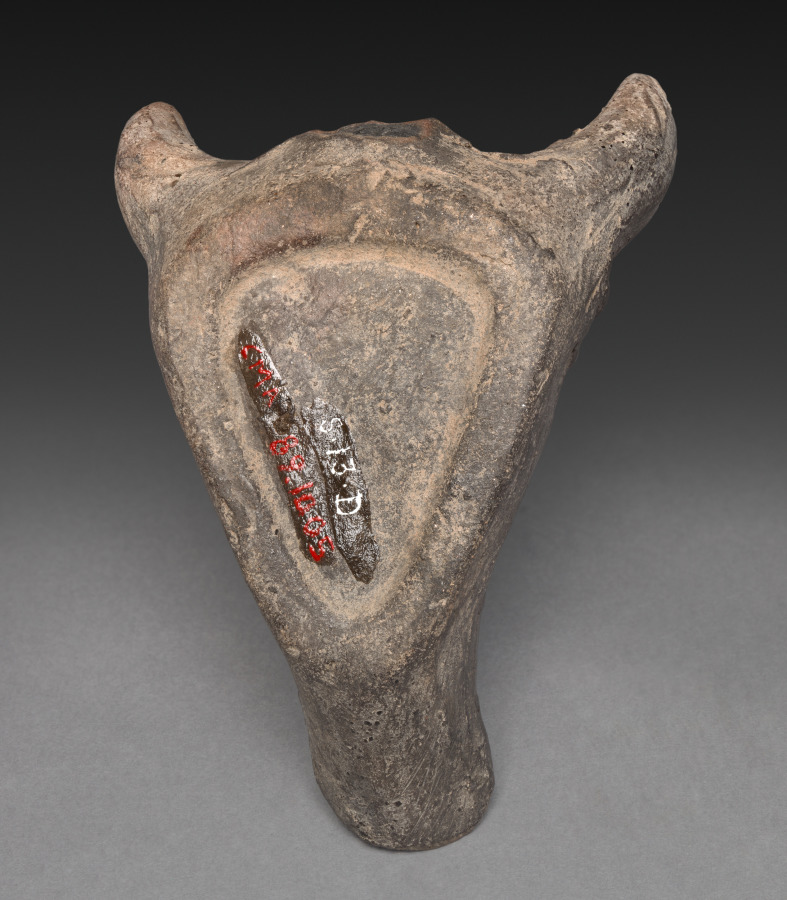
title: Bull's-head Lamp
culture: Greece, Greco-Roman Period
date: 100 BCE–100 CE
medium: Nile silt clay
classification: Vessels